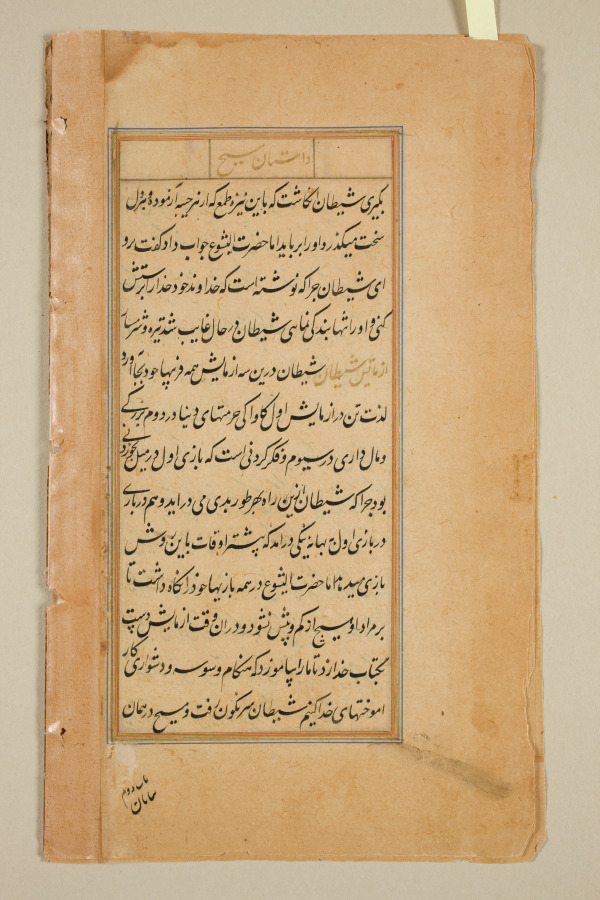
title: Text page from a Mirror of Holiness (Mir’at al-quds) of Father Jerome Xavier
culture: Mughal India, Allahabad, made for Prince Salim (1569–1627)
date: 1602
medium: Ink and gold on paper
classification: Manuscript